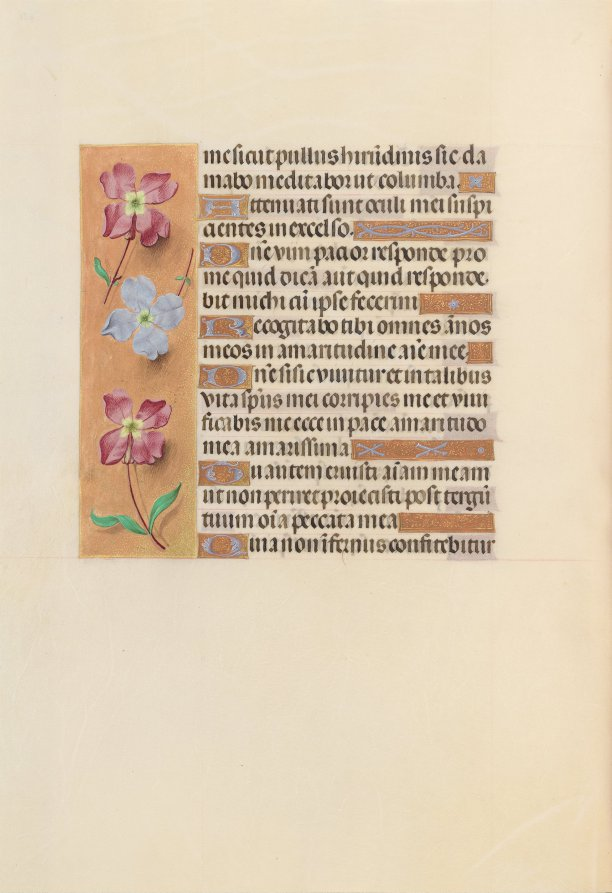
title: Hours of Queen Isabella the Catholic, Queen of Spain: Fol. 251v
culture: Flanders, Ghent and Bruges, late 15th century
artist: Master of the First Prayerbook of Maximillian (Flemish, c. 1444–1519)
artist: and Associates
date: c. 1500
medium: ink, tempera, and gold on vellum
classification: Bound Volume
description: This manuscript was illuminated by a circle of at least five highly organized manuscript painters active in the Flemish cities of Ghent and Bruges. The principal illuminator was Alexander Bening, who painted the majority of the book's miniatures. Manuscripts produced by this circle of artists are renowned for the decoration of their borders, which typically feature a rich variety of realistically-painted flowers, birds, and butterflies. This prayer book, called a book of hours, was intended not for a cleric, but for the private devotions of a lay person-in this case, Isabella the Catholic, Queen of Spain (1451-1504). Isabella's coat of arms embellishes the book's frontispiece. It is unlikely that the book was commissioned by the Queen herself; rather, she probably received it as a diplomatic gift from someone courting her patronage, perhaps Cardinal Francisco Jimenez de Cisneros. A Franciscan friar, Jimenez was dependent upon Isabella for his advancement, first to the post of Queen's confessor in 1492, and then to Archbishop of Toledo in 1495.